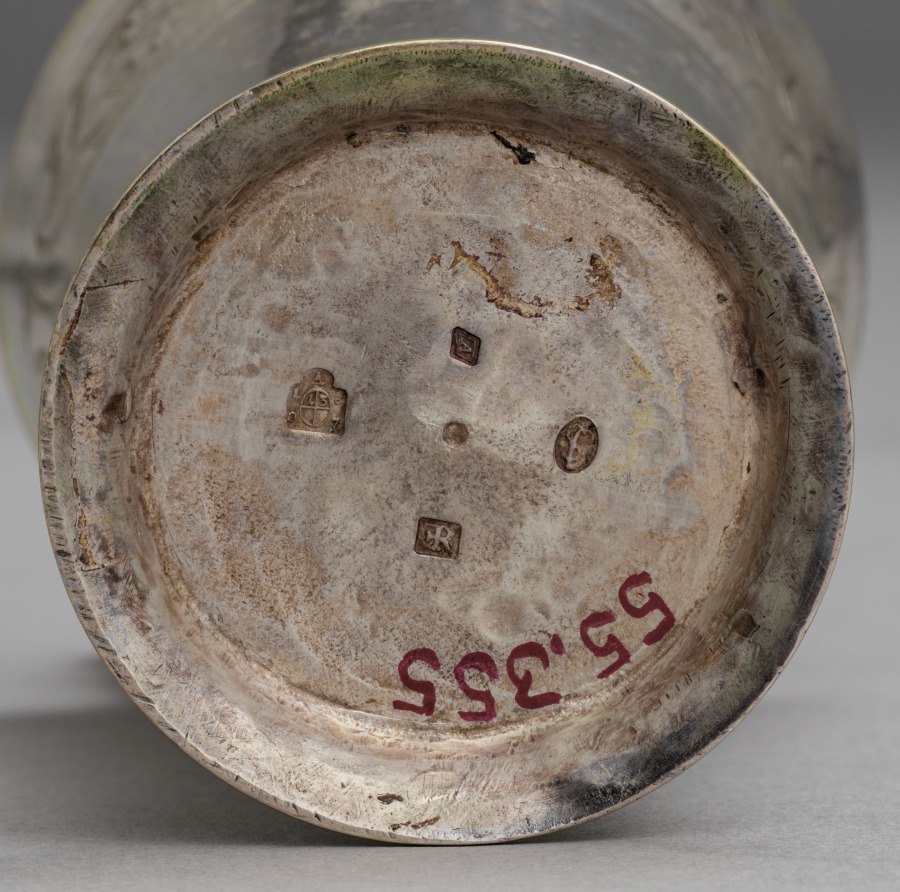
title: Beaker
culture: Austria, Vienna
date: 1807–12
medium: silver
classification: Silver